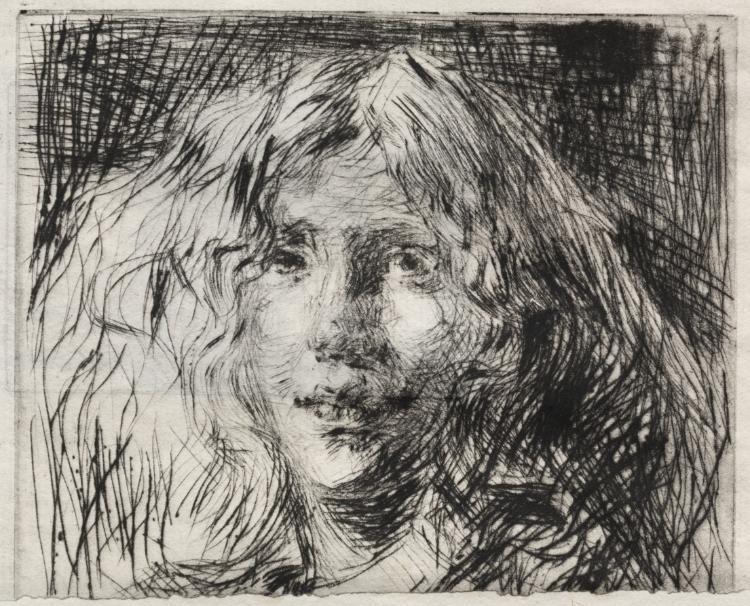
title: Joanna Hefferman, "La Belle Irlandaise"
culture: America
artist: James McNeill Whistler (American, 1834–1903)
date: 1866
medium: drypoint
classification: Print